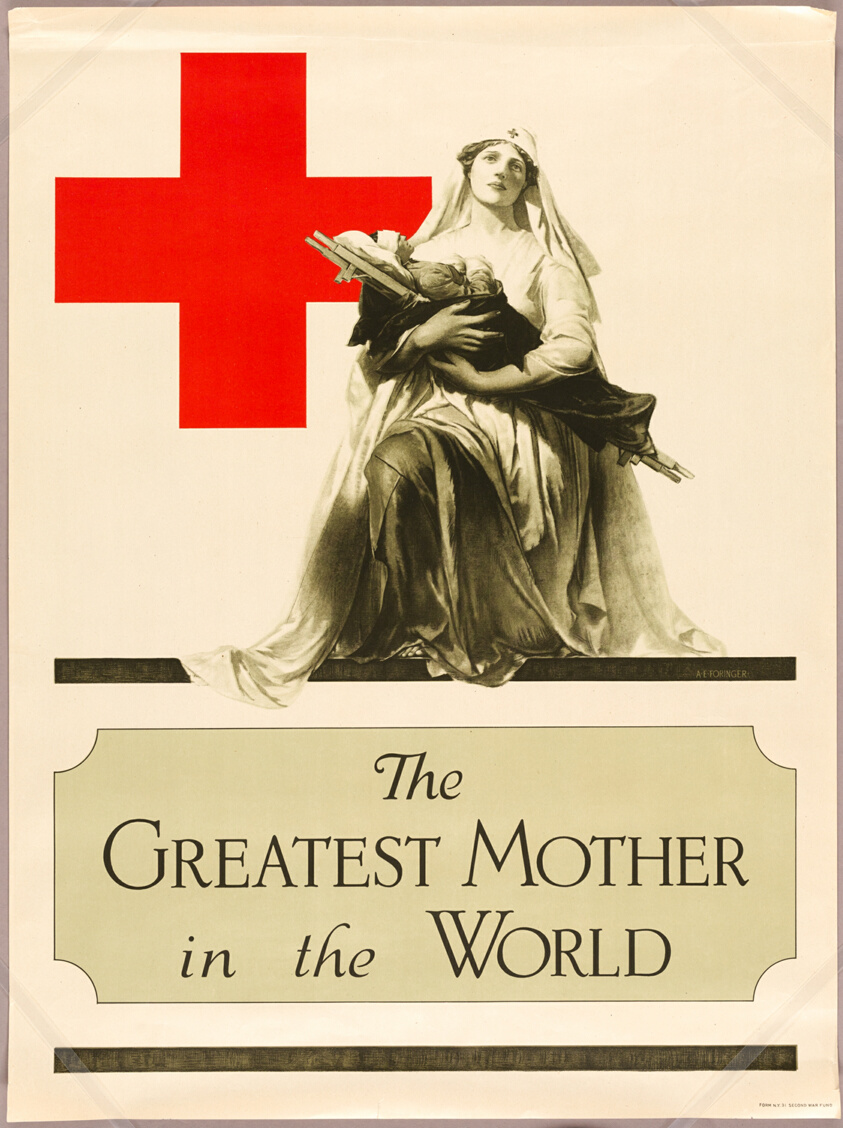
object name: Print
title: The Greatest Mother in the World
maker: Alonzo Earl Foringer (American, 1878-1948)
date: c. 1918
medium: Color lithograph on wove paper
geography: United States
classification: lithograph; print; prints and drawing